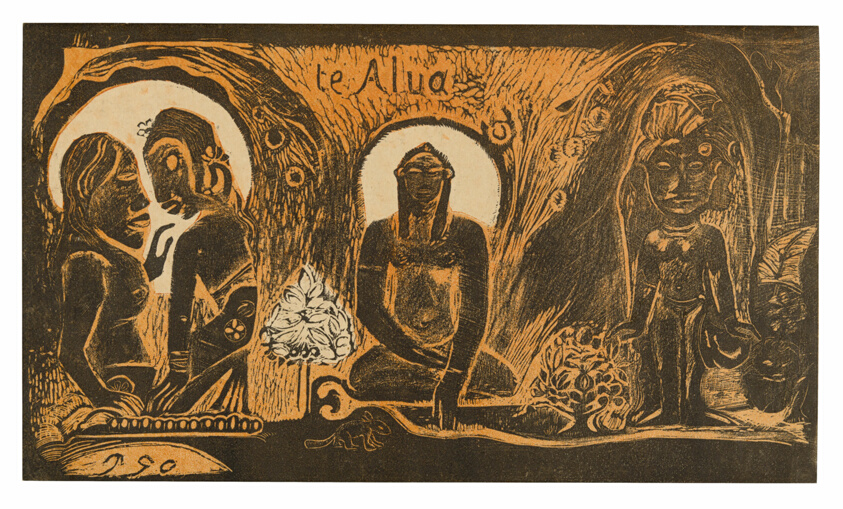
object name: Print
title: Te atua (The God), from the Noa Noa Suite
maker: Paul Gauguin (French, 1848-1903); printed in collaboration with Louis Roy (French, 1862-1907)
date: 1894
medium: Wood-block print in black ink, over a stenciled orange-ink tone block, on cream wove paper (an imitation Japanese vellum)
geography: France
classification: woodcut; print; prints and drawing